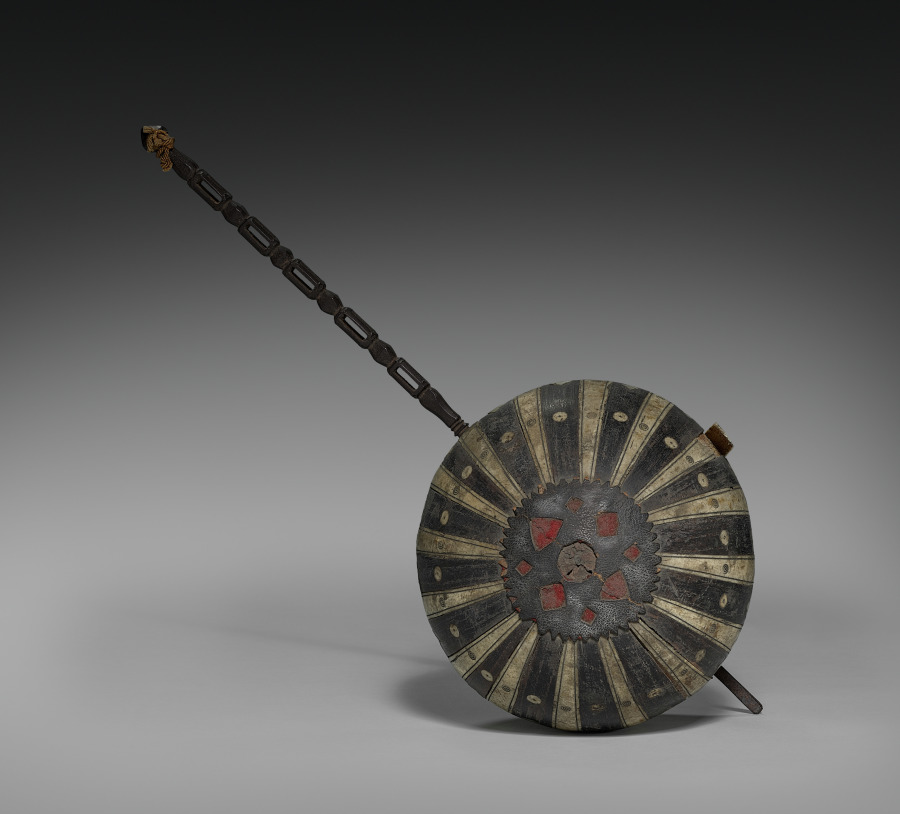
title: Kamānche (incomplete)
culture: Northern Iran (Caucasian, maybe Azerbaijan, or Kashmir)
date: 1875–1900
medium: Wood, hide, and bone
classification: Musical Instrument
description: Kamānche is a Persian term first used in the 10th century to describe an instrument that is sounded with a bow. From there, bowed instruments spread to Byzantium, Central Asia, the Far East, and then to Europe. In Egypt, it is known as the rabāb, a term known throughout the Islamic world from North Africa to Southeast Asia. The names of musical instruments often reveal origin, context, or musical function. In Europe, North Africa, and Asia where contact with Middle Eastern culture occurred, variations of Arabic and Persian terms for instruments are widespread. Usually, related names refer to similar instruments; however, this is not always true. Among these "floating terms" are the names zūrna, rabāb, kāmanja, nāy, and dombak.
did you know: The instrument's spike would be placed on the ground or today, on the knee, when it was played.